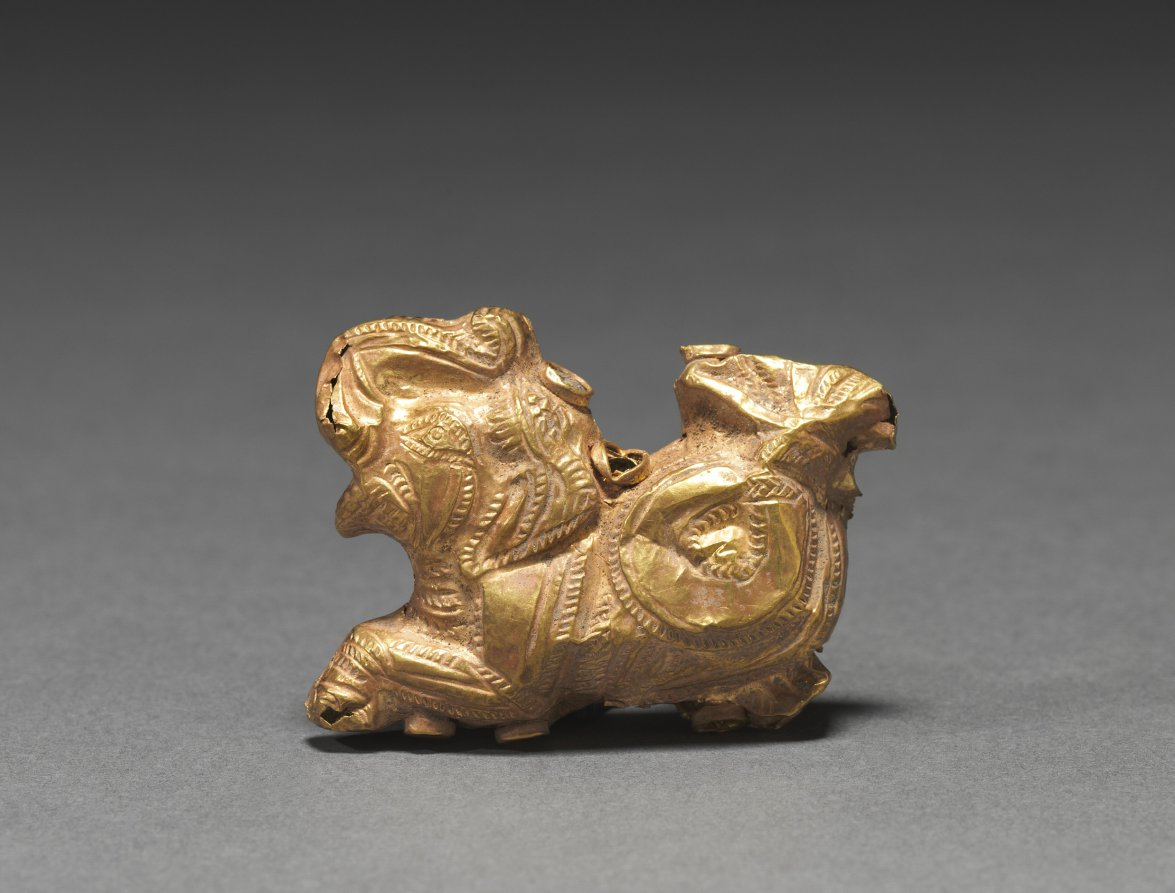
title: Pendant in the Shape of a Fish-Tailed Elephant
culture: India, Shunga period (185–78 BCE)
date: 185–72 BCE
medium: gold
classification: Jewelry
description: Because of water's life-giving properties, animals such as fish and Indian elephants who love the water were considered auspicious. This composite elephant with a playfully raised trunk and a curling fish tail would have been strung as a pendant on a necklace.